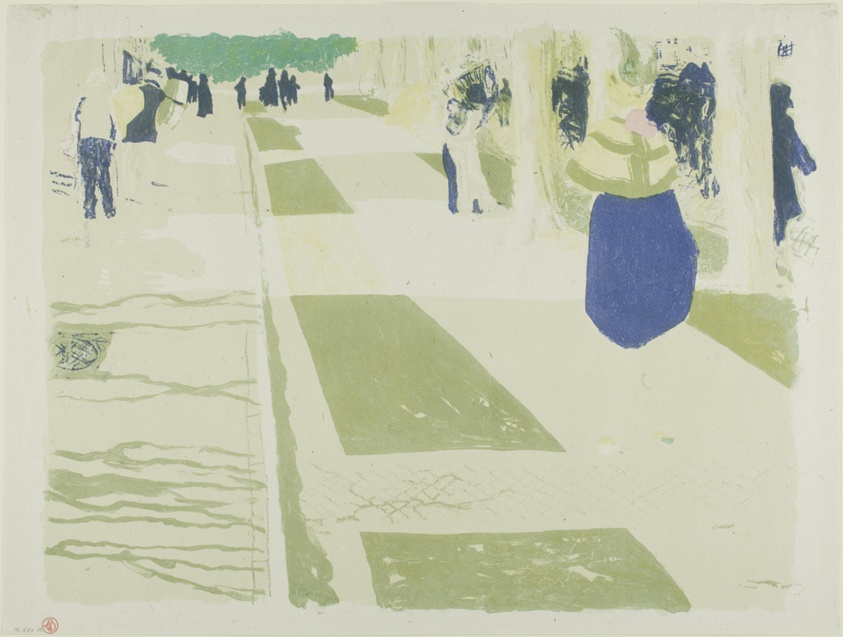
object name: Print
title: The Avenue, plate two from Landscapes and Interiors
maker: Edouard Vuillard (French, 1868-1940); printed by Auguste Clot (French, 1858-1936); published by Ambroise Vollard (French, 1867-1939)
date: 1899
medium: Color lithograph on grayish-ivory China paper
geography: France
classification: lithograph; print; prints and drawing